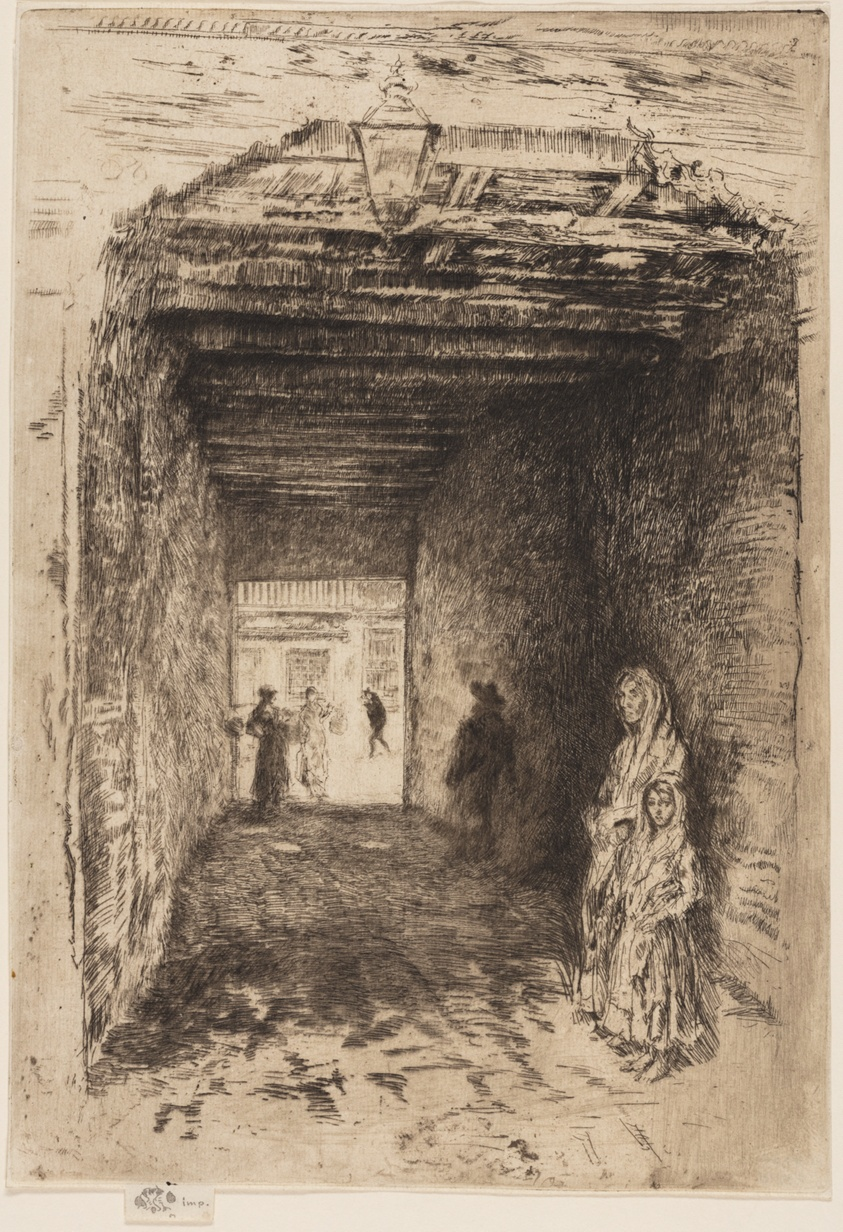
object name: Print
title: The Beggars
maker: James McNeill Whistler (American, 1834-1903)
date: 1879/80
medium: Etching and drypoint with foul biting in black ink on off-white laid paper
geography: United States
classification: etching; foul biting; print; prints and drawing; drypoint; paper